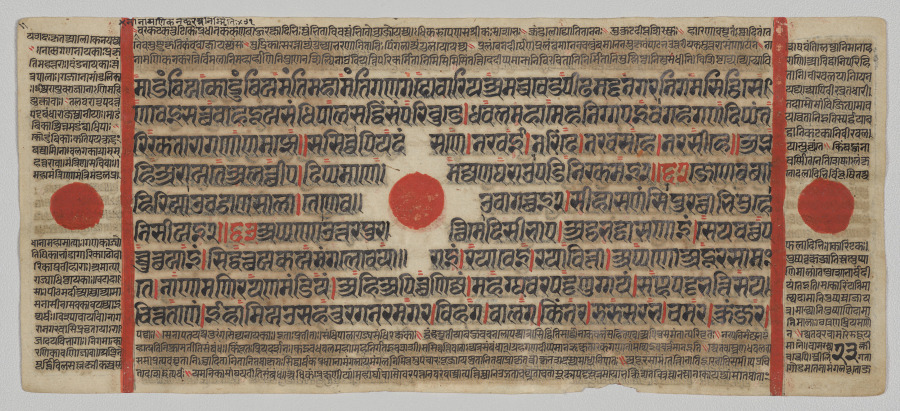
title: Text, Folio 23 (verso), from a Kalpa-sutra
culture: Western India, Gujarat, last quarter of the 15th century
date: c. 1475–1500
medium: Gum tempera, ink, and gold on paper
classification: Painting